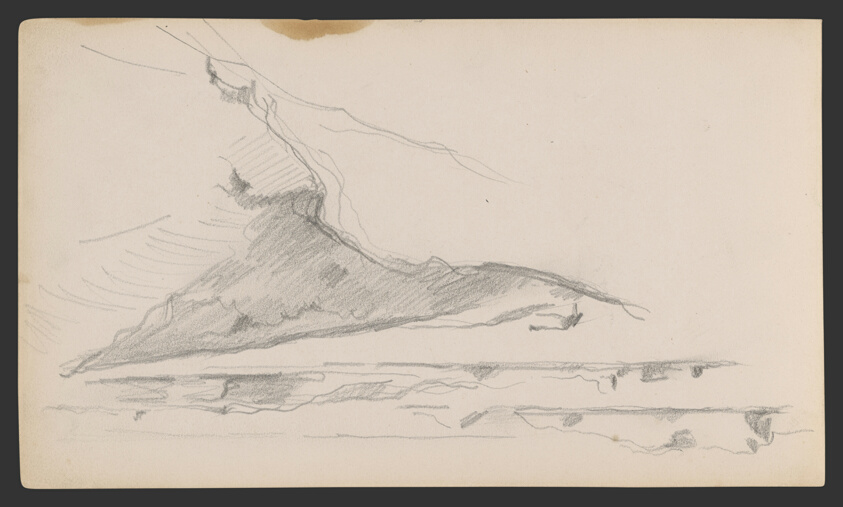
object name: Drawing and Watercolor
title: Sketchbook No. 2 (L'Estaque)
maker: Paul Cézanne; French, 1839-1906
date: 1875–86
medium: Graphite and pen and ink drawings on paper, bound into a book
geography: France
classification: sketchbook; graphite; prints and drawing; paper